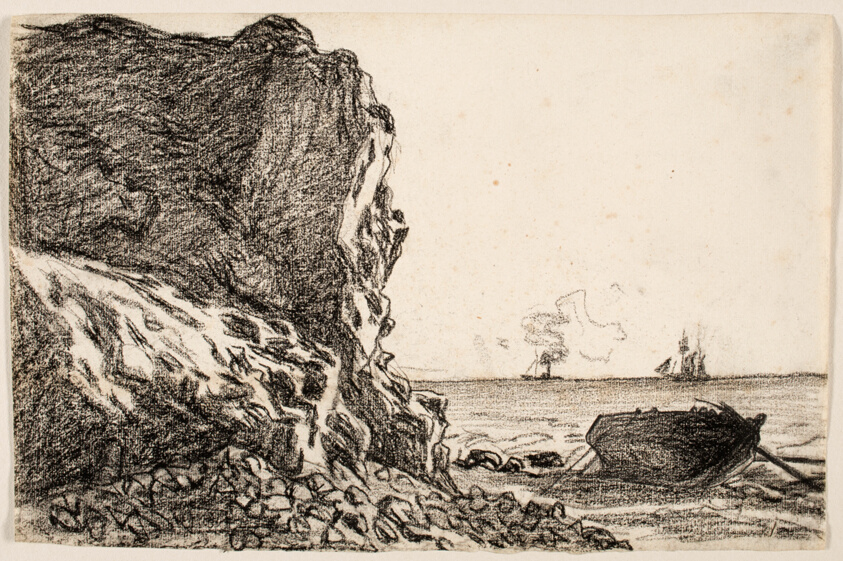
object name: Drawing and Watercolor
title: Cliffs and Sea, Sainte-Adresse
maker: Claude Monet (French, 1840-1926)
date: c. 1864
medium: Black chalk on ivory laid paper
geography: France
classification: chalk; drawings (visual works); prints and drawing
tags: landscapes